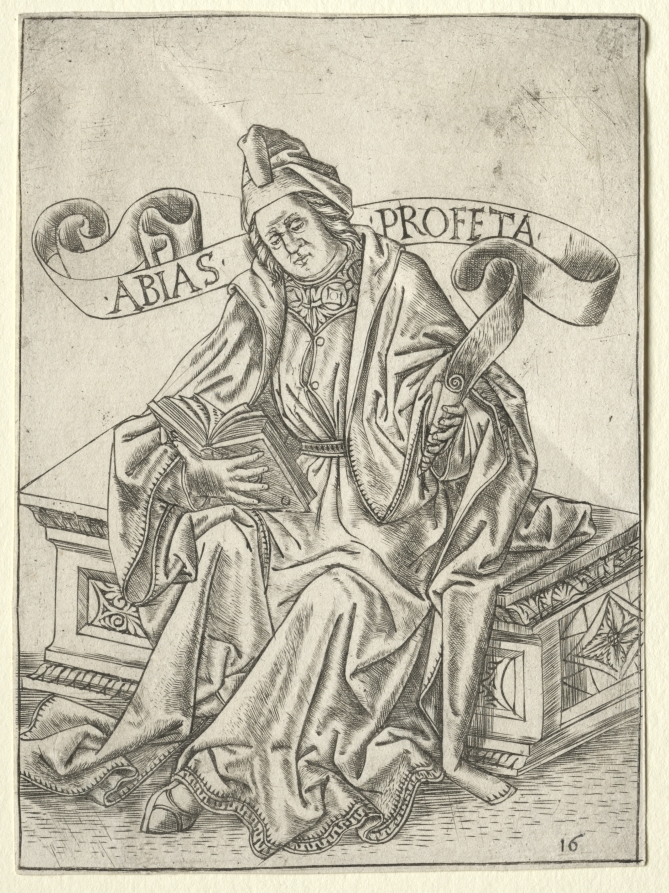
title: The Prophets: Obadiah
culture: Italy, Florence, 15th century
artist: attributed to Baccio Baldini (Italian, c. 1436–1487)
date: c. 1470–1475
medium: engraving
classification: Print